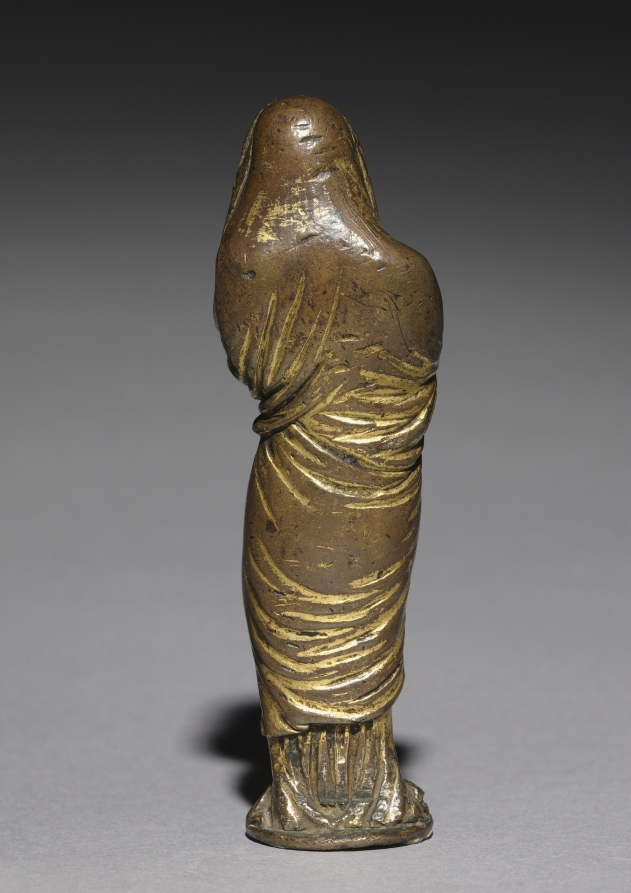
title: Mourning Mary, Probably from an Altar Cross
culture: Mosan, Valley of the Meuse, Gothic period. 13th century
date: 1200–1300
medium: gilded bronze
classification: Sculpture